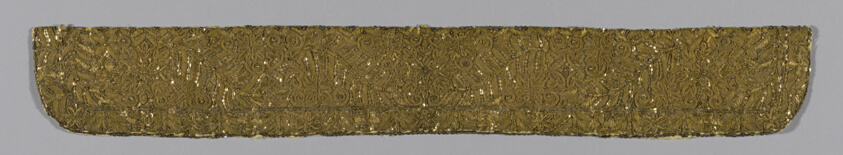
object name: Textile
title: Band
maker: Austria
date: 19th century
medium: Silk, plain weave; embroidered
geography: Austria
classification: textile; needlework (visual works)